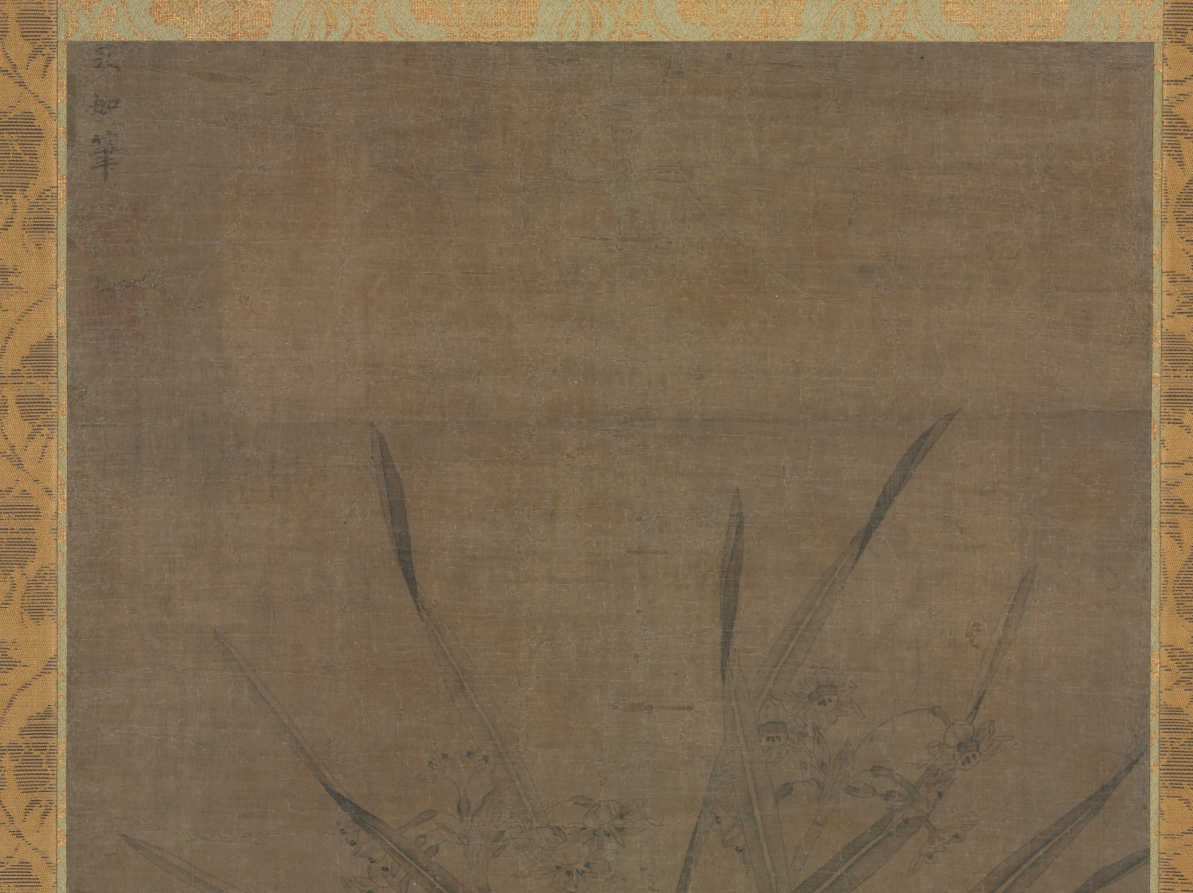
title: Narcissus and Rocks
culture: China, Ming dynasty (1368–1644)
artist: Lu Tianru (Chinese, first half of 1400s)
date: 1368–1644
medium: hanging scroll, ink on silk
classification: Painting